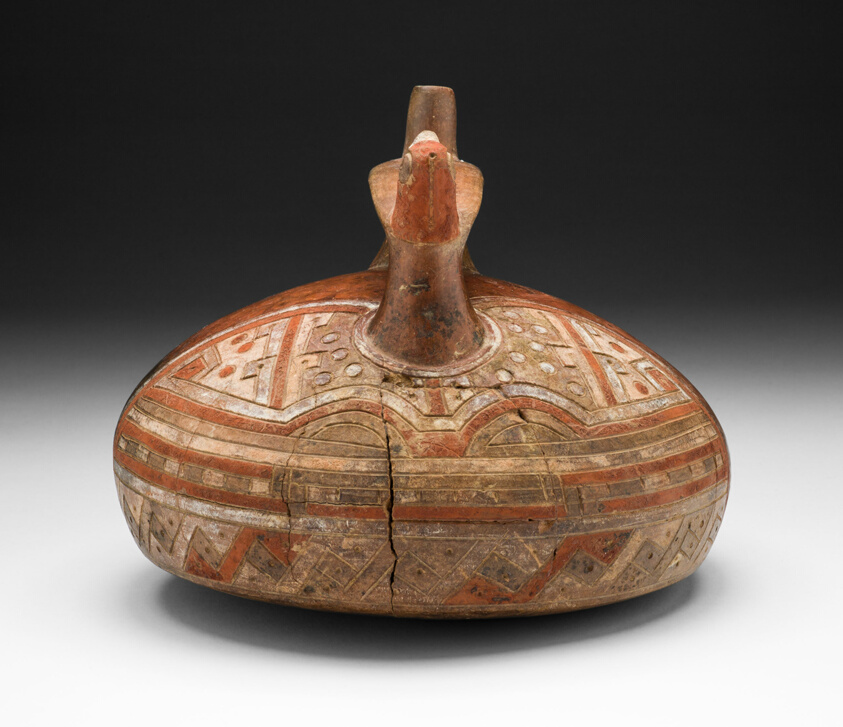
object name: Vessel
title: Vessel with Abstract Feline Mask and Bird-Head Spout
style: paracas, early horizon, Pre-Columbian, americas, andes, Arts of the Americas, andean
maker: Paracas (Ica Valley, south coast, Peru)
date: 650–150 BCE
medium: Ceramic with resinous postfire paint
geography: Ica Valley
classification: earthenware; art of the americas; ceramics; vessel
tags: feline, animals, birds, geometric, abstract motifs